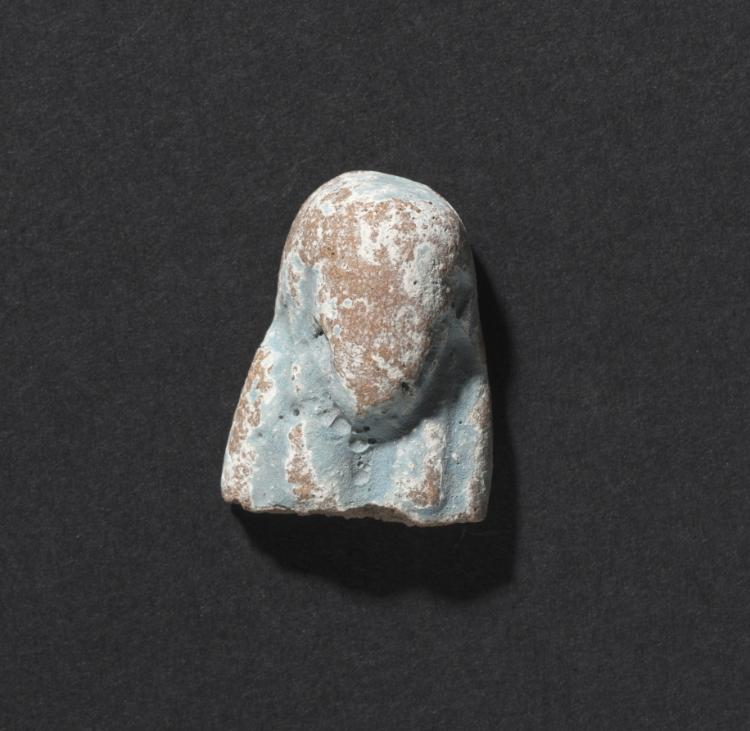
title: Shawabty of Ditamenpaankh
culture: Egypt, Late period (715–332 BCE), Dynasty 25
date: 715–656 BCE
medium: terracotta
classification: Funerary Equipment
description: High demand for shawabtys in the Late Period, a time when as many as 400 or more shawabtys were placed in the tomb with the deceased, gave rise to a specialized container for storing them: the shawabty box. This example is inscribed for the lady of the house, Ditamenpaankh, and was probably one of a pair originally made for her. The single-masted boat on the box's lid is perhaps an allusion to the pilgrimage of the deceased to the holy city of Abydos, the cult city of Osiris, king of the dead. The shawabtys inside are crude, mass-produced examples cast in an open mold. Made of terracotta, their blue paint imitates more costly shawabtys made of faience. As for the shawabty spell, it has been removed from its traditional location on the shawabty's front and relocated onto the sides of box, where it needed only to be written once, thus expediting production.